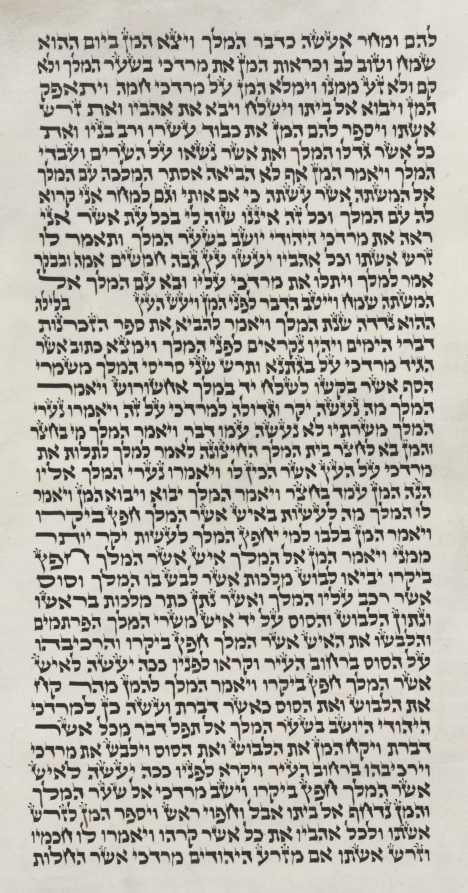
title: Scroll of Esther for the Purim Festival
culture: Europe (Eastern?), Hebrew, 19th century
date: c. 1850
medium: ink on vellum (eight columns, 39 lines of text on three membranes)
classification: Manuscript